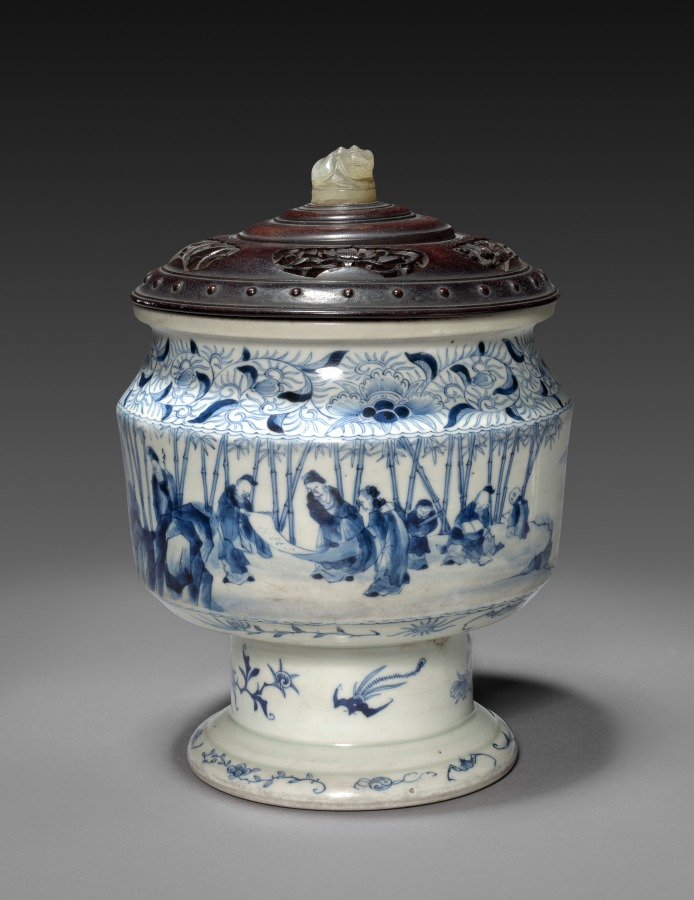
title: Jar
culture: Japan, Edo period (1615–1868)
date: early to mid-1800s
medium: porcelain with underglaze blue; teak and carved stone (lid)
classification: Ceramic